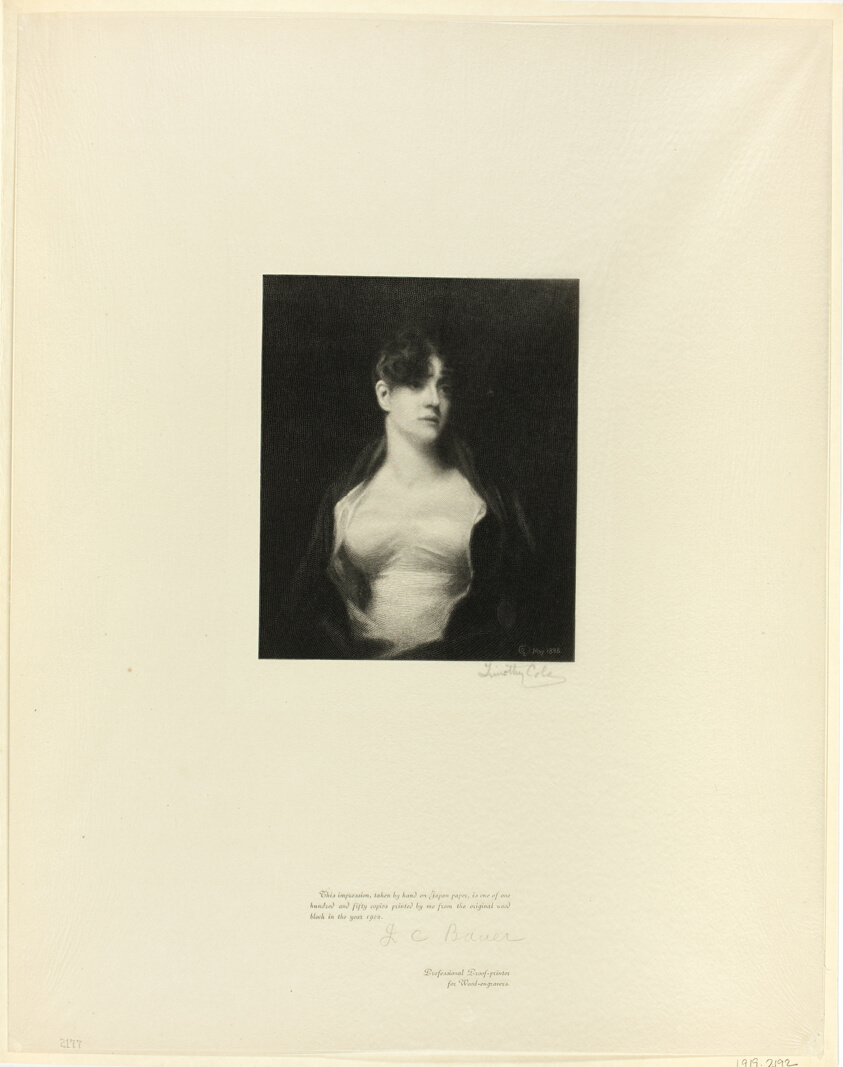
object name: Print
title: Mrs. R. Scott Moncrieff, from Old English Masters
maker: Timothy Cole (American, born England, 1852-1931); after Sir Henry Raeburn (Scottish, 1756-1823)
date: 1898, printed 1902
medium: Wood engraving on chine paper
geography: United States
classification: wood engraving; print; prints and drawing